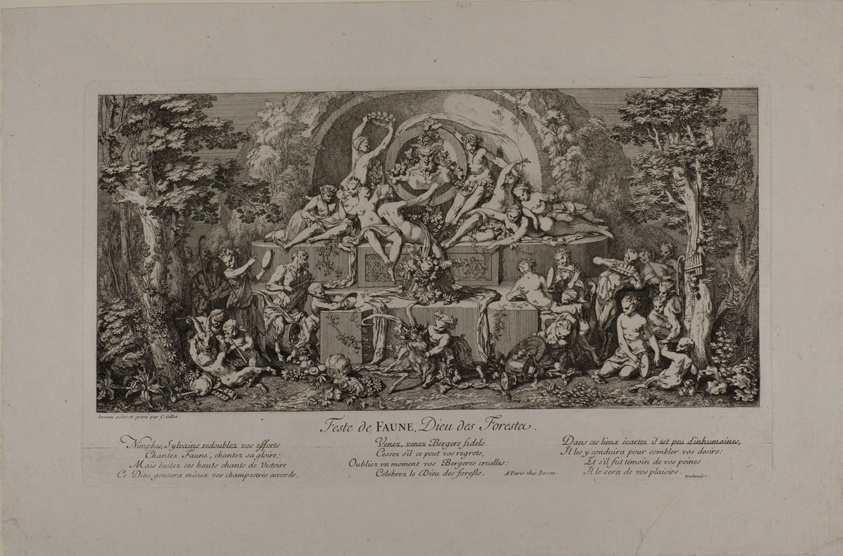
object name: Print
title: Feste de Faune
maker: Claude Gillot (French, 1673-1722)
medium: Etching on paper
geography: France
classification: etching; print; prints and drawing